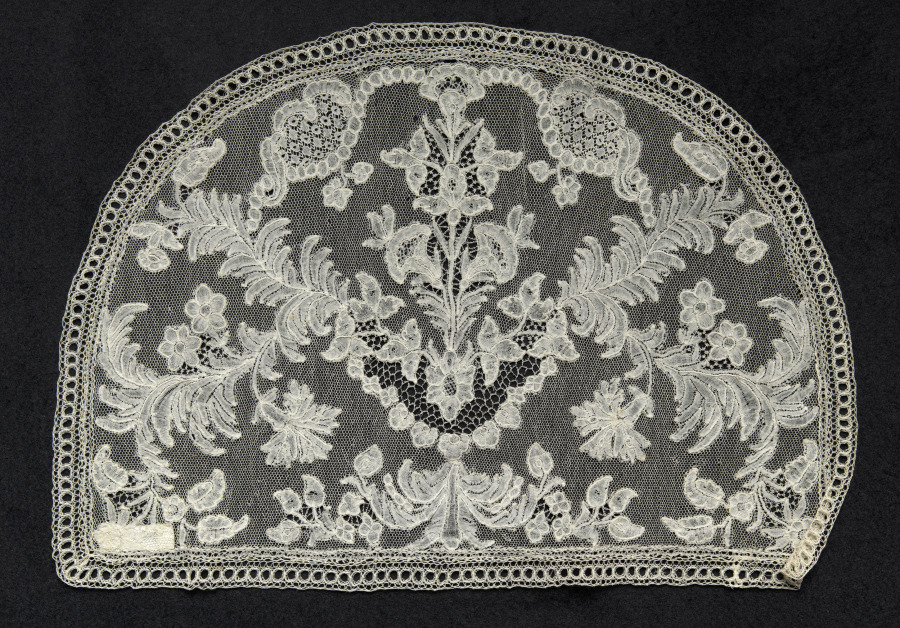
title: Lace Cap Crown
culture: Belgium, Brussels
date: 1700–1720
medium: Bobbin lace (Point d'Angleterre)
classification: Lace